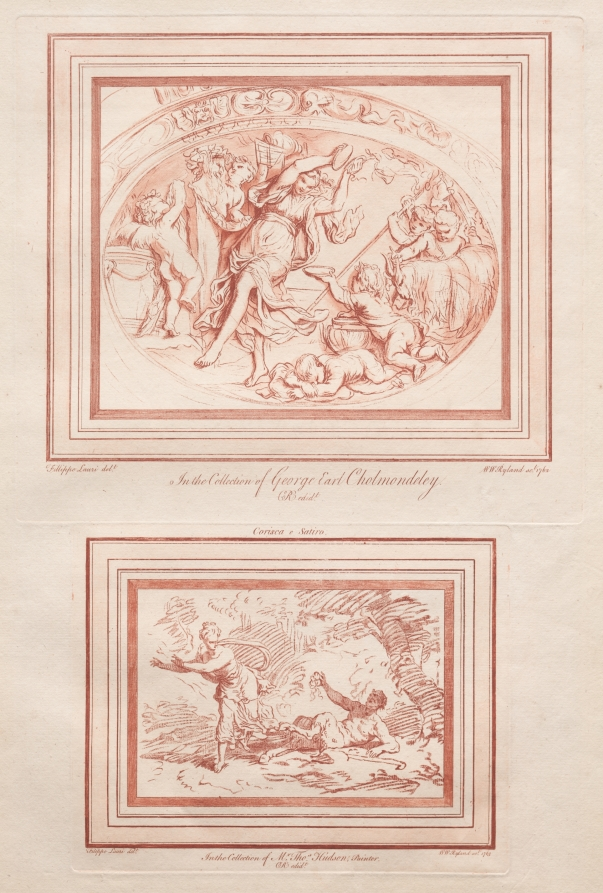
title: Corsica e Satiro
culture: England, 18th century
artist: William Ryland (British, 1732–1783)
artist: after Filippo Lauri (Italian, 1623–1694)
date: 1762–1763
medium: chalk-manner etching and engraving printed in red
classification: Print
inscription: inscribed, lower margin, in plate: In the Collection of George Earl Cholmondeley. / CR edidt.; inscribed, lower margin, in plate: In the Collection of Mr. Thos. Hudson, Painter. / CR edidt.